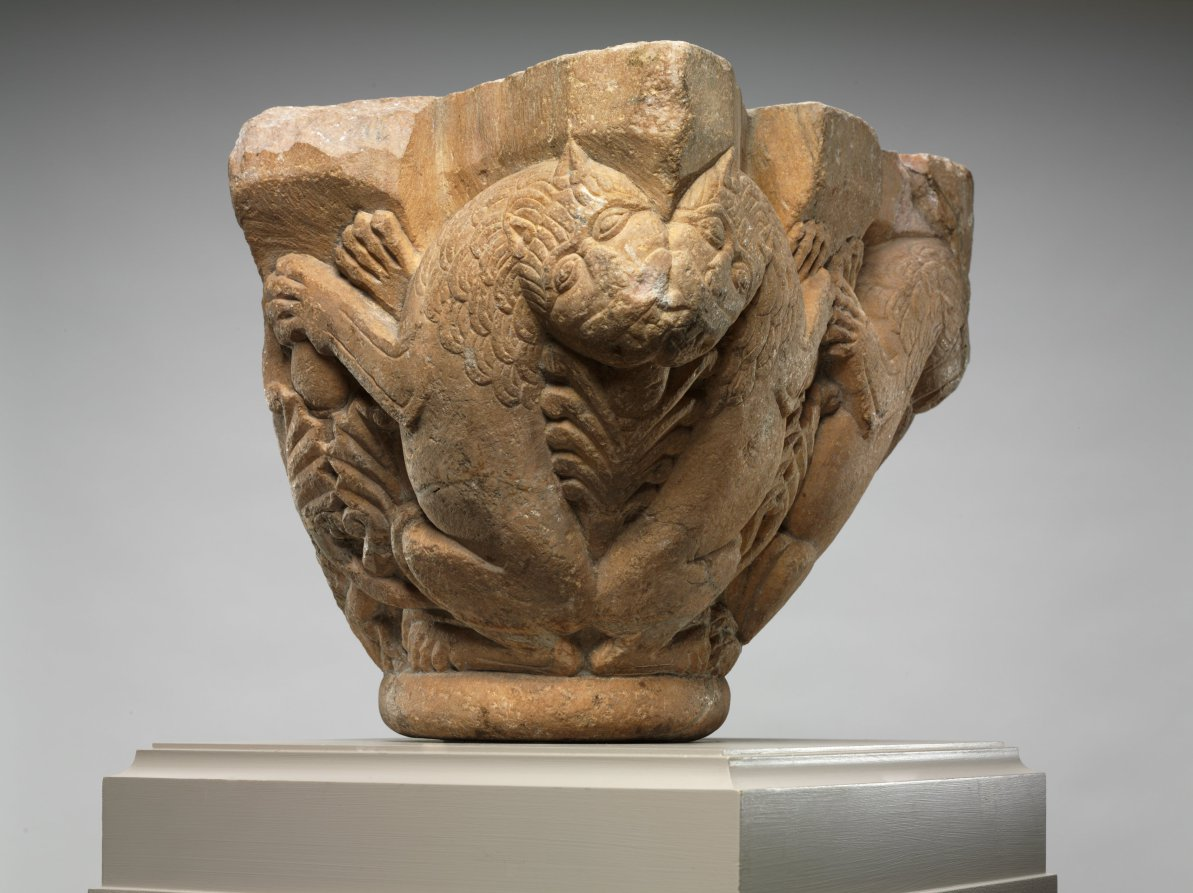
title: Engaged Capital with Lions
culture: Northern Spain (Navarre ?) or Southwest France (Pyrénées or Roussillon ?), mid-12th century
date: 1145–64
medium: marble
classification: Sculpture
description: The compositional motif of confronted and addorsed beasts illustrated on this capital was especially popular in churches along the pilgrimage roads.